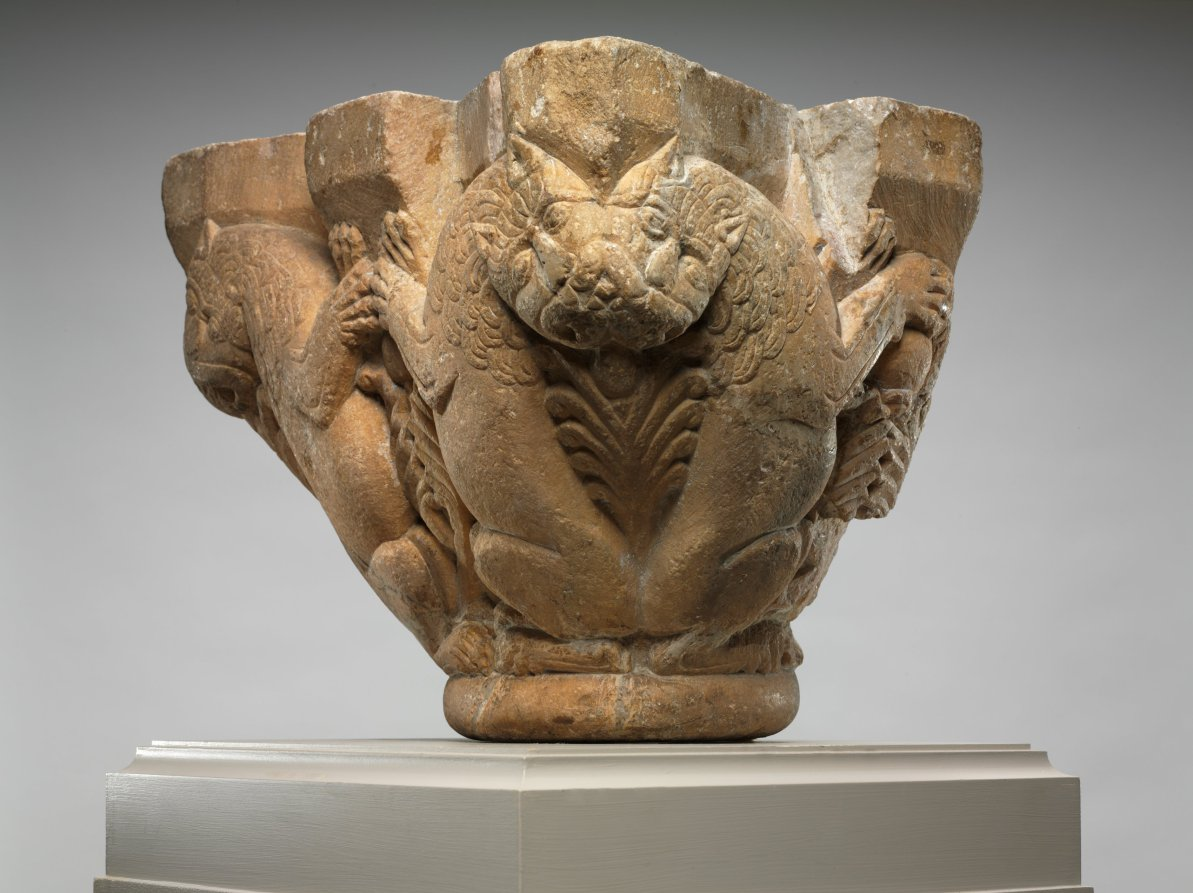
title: Engaged Capital with Lions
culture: Northern Spain (Navarre ?) or Southwest France (Pyrénées or Roussillon ?), mid-12th century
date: 1145–64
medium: marble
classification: Sculpture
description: The compositional motif of confronted and addorsed beasts illustrated on this capital was especially popular in churches along the pilgrimage roads.